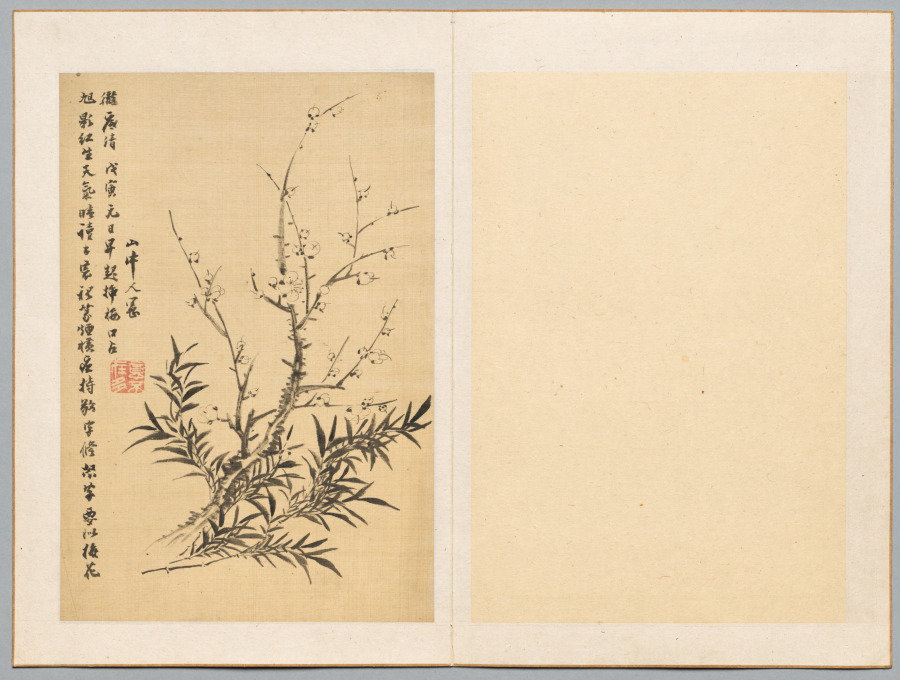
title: Plum Blossoms and Bamboo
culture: Japan, Edo period (1615–1868)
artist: Tanomura Chikuden (Japanese, 1777–1835)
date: 1818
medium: leaf from a pair of folding albums; ink and light color on paper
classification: Portfolio